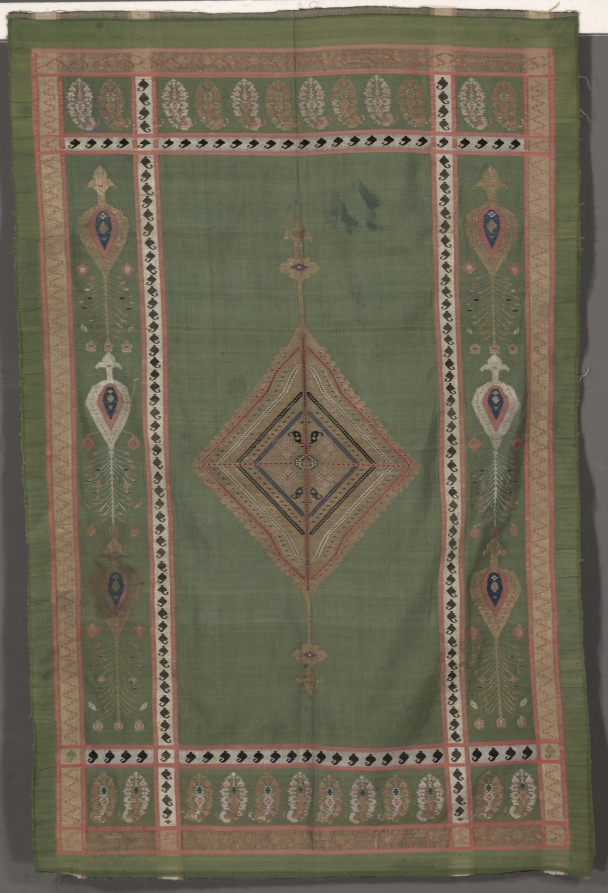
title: Scarf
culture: Iran, 19th century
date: 1800s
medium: twill and tabby weaves, brocaded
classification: Textile